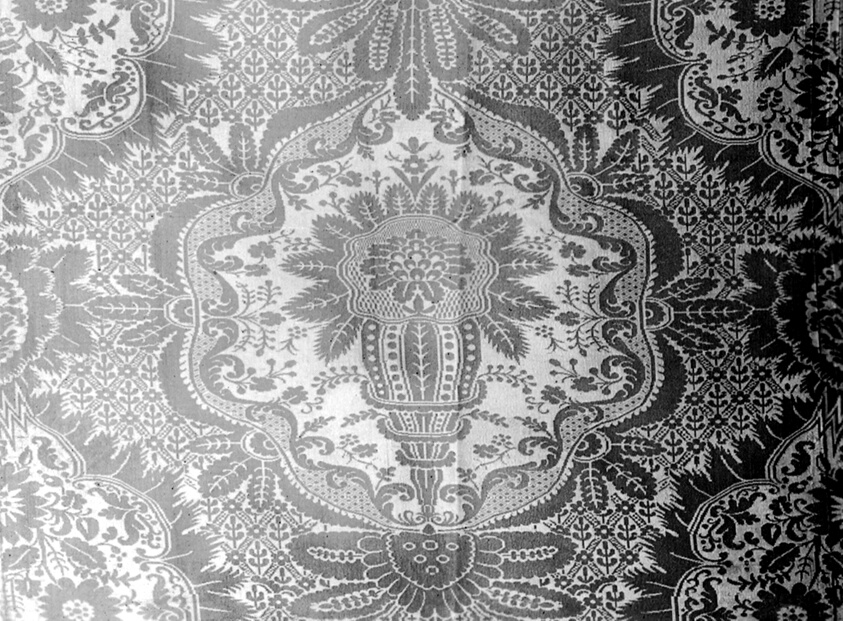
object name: Textile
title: Three Panels (Furnishing Fabric ?)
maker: France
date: c. 1725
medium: Silk, plain weave with supplementary patterning wefts tied by supplementary binding warps in plain interlacings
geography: France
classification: textile; weaving; furnishing textile